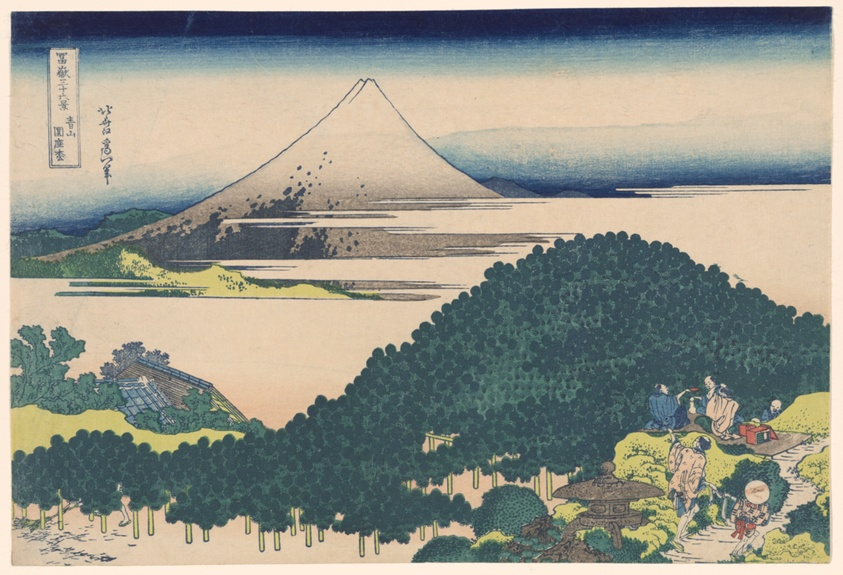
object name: Print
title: Cushion Pine Tree at Aoyama (Aoyama Enza no matsu), from the series "Thirty-six Views of Mount Fuji (Fugaku sanjurokkei)"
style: Japanese (culture or style)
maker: Katsushika Hokusai 葛飾 北斎; Japanese, 1760-1849; Publisher: Hibino Yohachi; Japanese, unknown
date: c. 1830/33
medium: Color woodblock print; oban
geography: Japan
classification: woodblock print; print; asian art